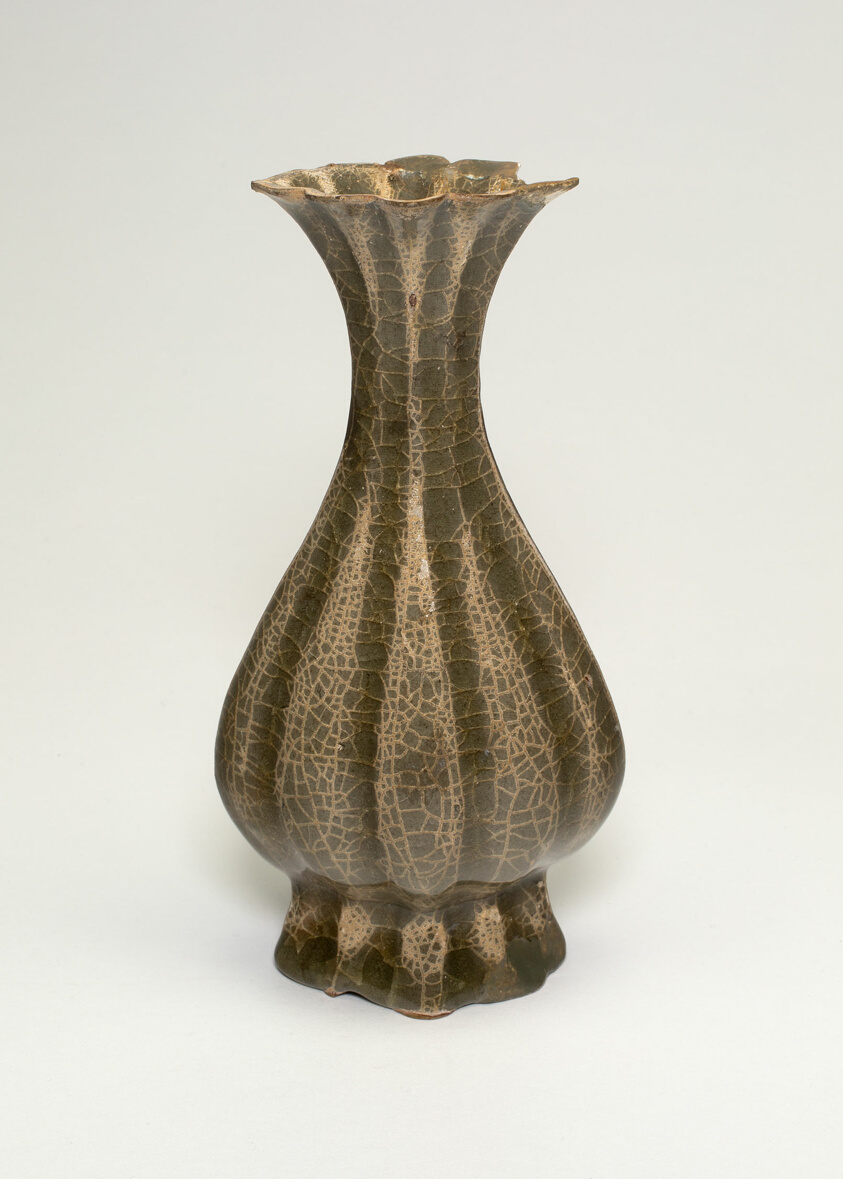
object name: Vessel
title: Fluted Vase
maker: China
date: Song dynasty (960–1279)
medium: Guan ware; stoneware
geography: China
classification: ceramics; asian art